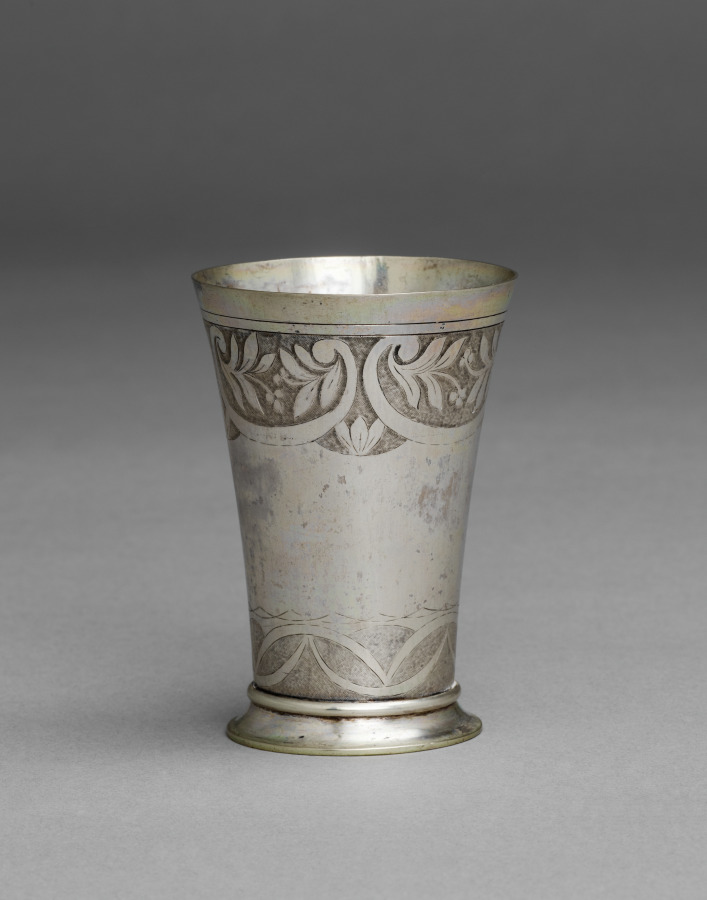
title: Beaker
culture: Austria, Vienna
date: 1807–12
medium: silver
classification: Silver